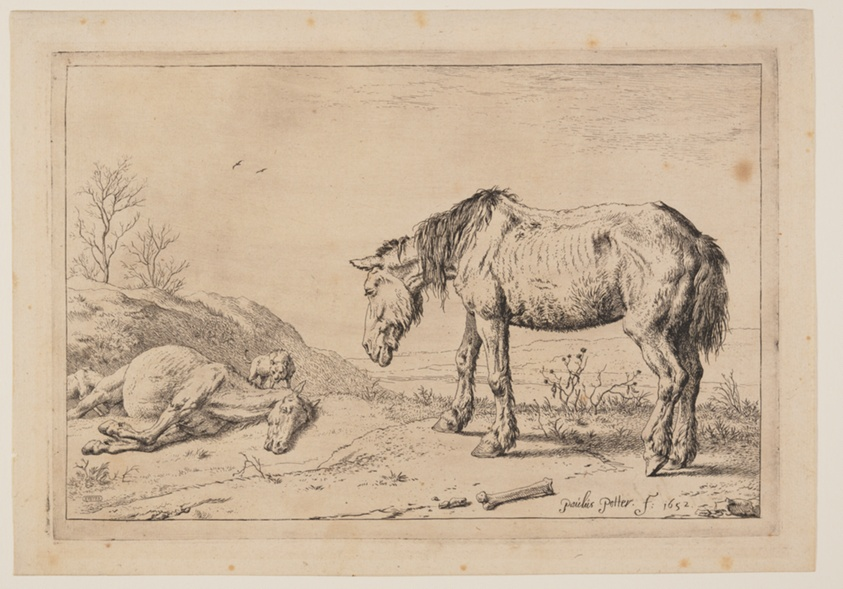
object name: Print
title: The Worn-Out Horse, (La Mazette), from Series of Horses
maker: Paulus Potter (Dutch, 1625–1654)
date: 1652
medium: Etching on ivory laid paper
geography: Netherlands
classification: print; paper; prints and drawing; etching